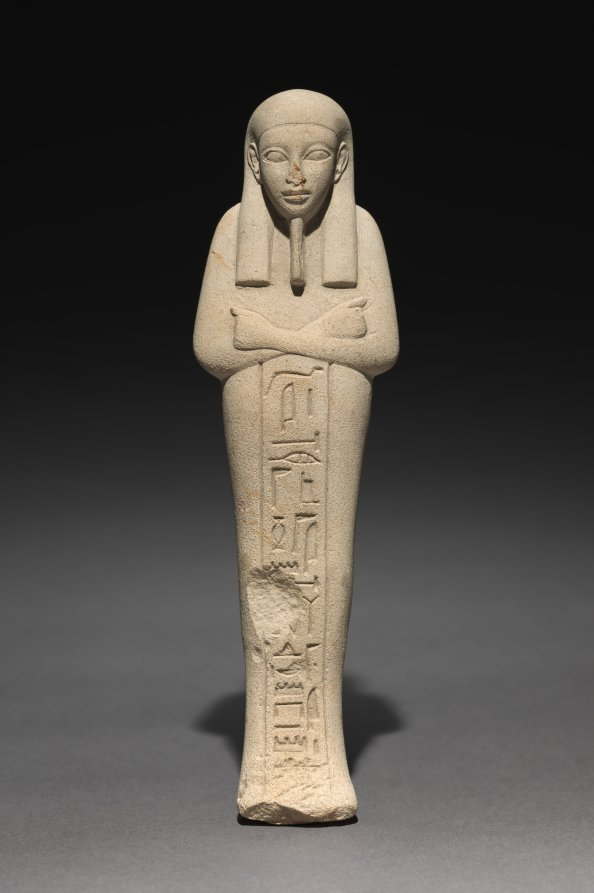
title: Shawabty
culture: Egypt, Modern forgery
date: forgery of the early 20th century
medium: limestone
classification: Funerary Equipment